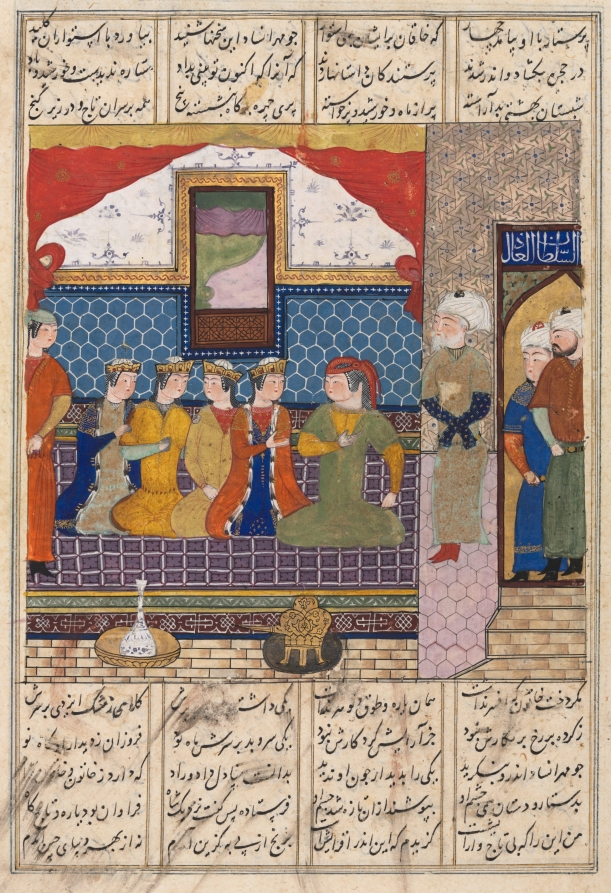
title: Nushirwan Sends Mihran Sitad to Fetch the Daughter of the King of China (recto) from a Shahnama (Book of Kings) of Firdausi (940–1019 or 1025)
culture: Iran, Shiraz, Timurid period (1370-1501)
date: c. 1482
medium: opaque watercolor, ink, and gold on paper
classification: Manuscript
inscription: Script: Nasta'liq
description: The Iranian painting traditions of creating a conceptual space, symmetry, and decoration characterize this illustration of a scene in the life of the Shi’a Imam Ali, son-in-law of the Prophet Muhammad. The inscription over the door reads “the just sultan.”